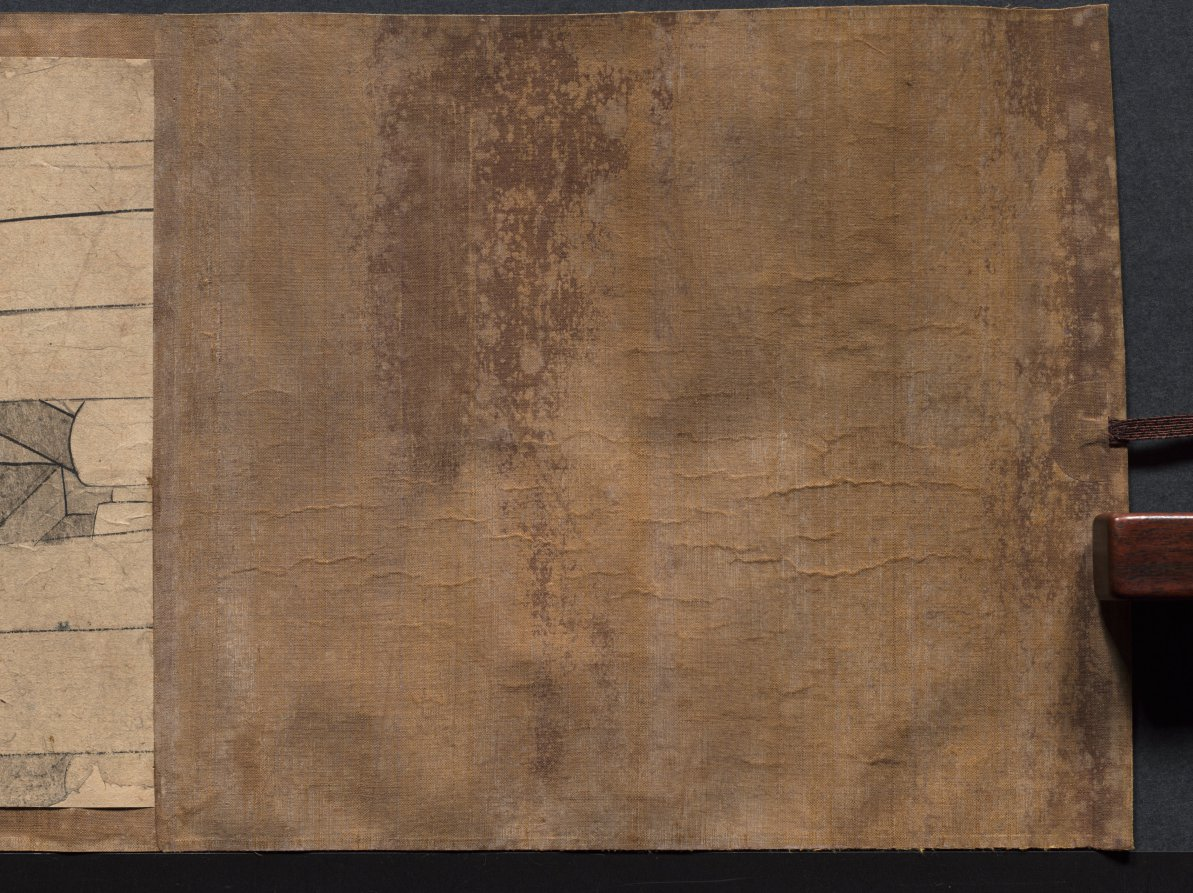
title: Oeyama Engi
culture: Japan, Edo period (1615–1868)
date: 1615–1868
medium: one of a pair of handscrolls; ink and color on paper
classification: Painting